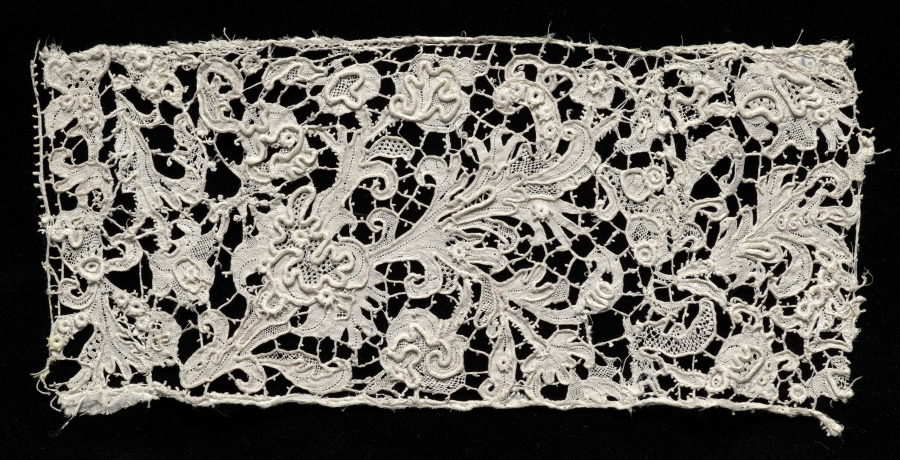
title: Lace Border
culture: Italy, Venice, 1600s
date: 1600s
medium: Needle lace (Venetian Raised Point)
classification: Lace